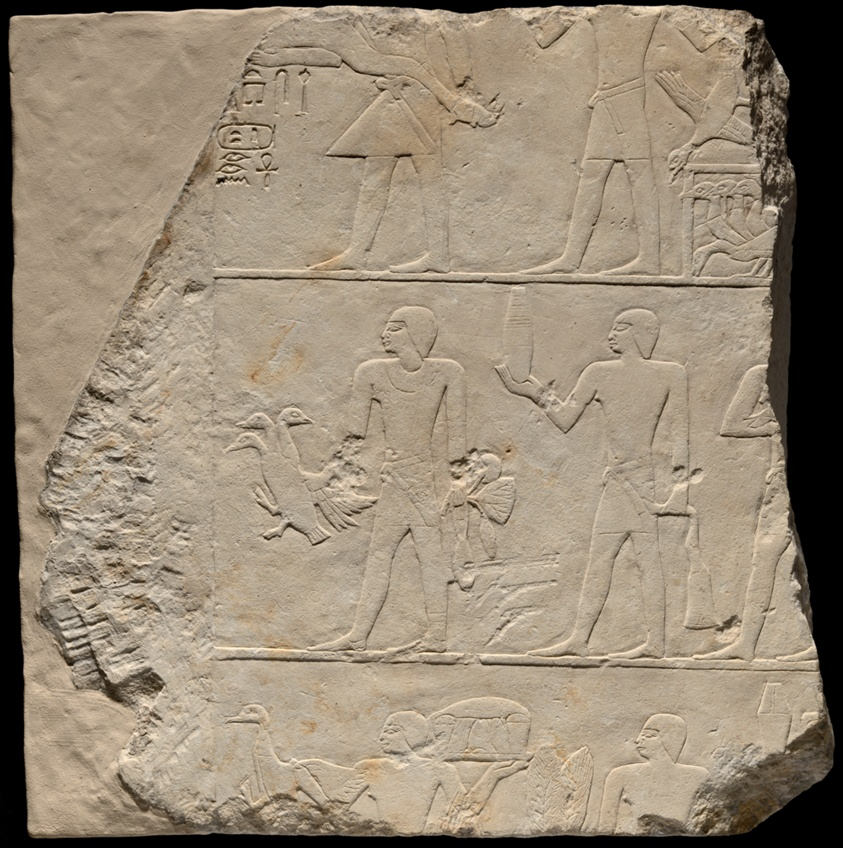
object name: Architectural fragment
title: Wall Fragment from a Tomb Depicting Offering Bearers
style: egyptian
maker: Egyptian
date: Old Kingdom, Dynasty 6 (about 2400–2250 BCE)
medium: Limestone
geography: Egypt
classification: architectural fragment; stone; sculpture; ancient art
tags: offering